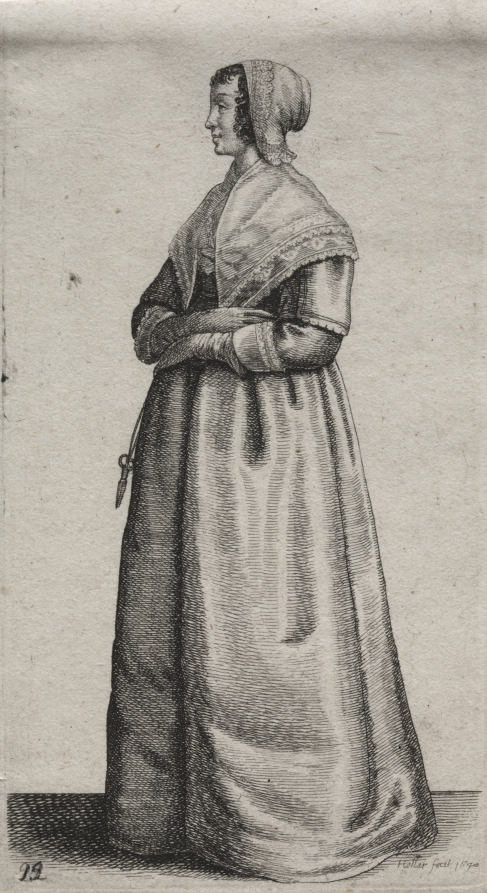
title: The Several Habits of English Women, from the Nobility to the Country Women as they are in these times: The Woman with Scissors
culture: Bohemia, 17th century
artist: Wenceslaus Hollar (Bohemian, 1607–1677)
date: c, 1640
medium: etching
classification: Print